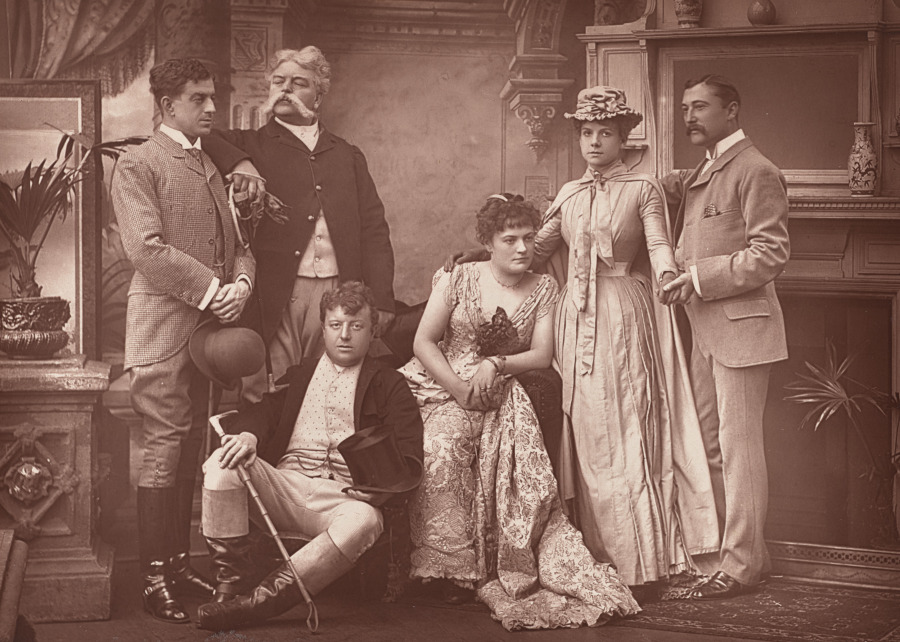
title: "A Run of Luck," at Drury Lane Theatre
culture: England, 19th century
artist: Herbert Rose Barraud (British, 1845–1906)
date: 1886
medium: woodburytype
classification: Photograph